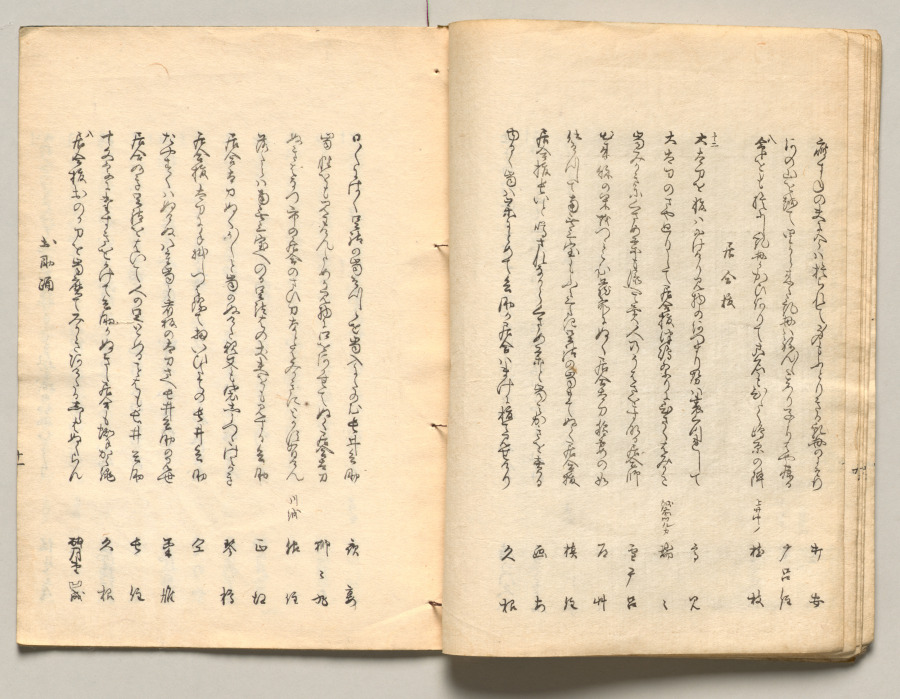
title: Spread Nineteen from Volume Four of People of Japan in Light Verse (Kyōka)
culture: Japan, Edo period (1615–1868)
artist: Utagawa Hiroshige (Japanese, 1797–1858)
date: 1857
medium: Woodblock-printed book; ink and color on paper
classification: Bound Volume